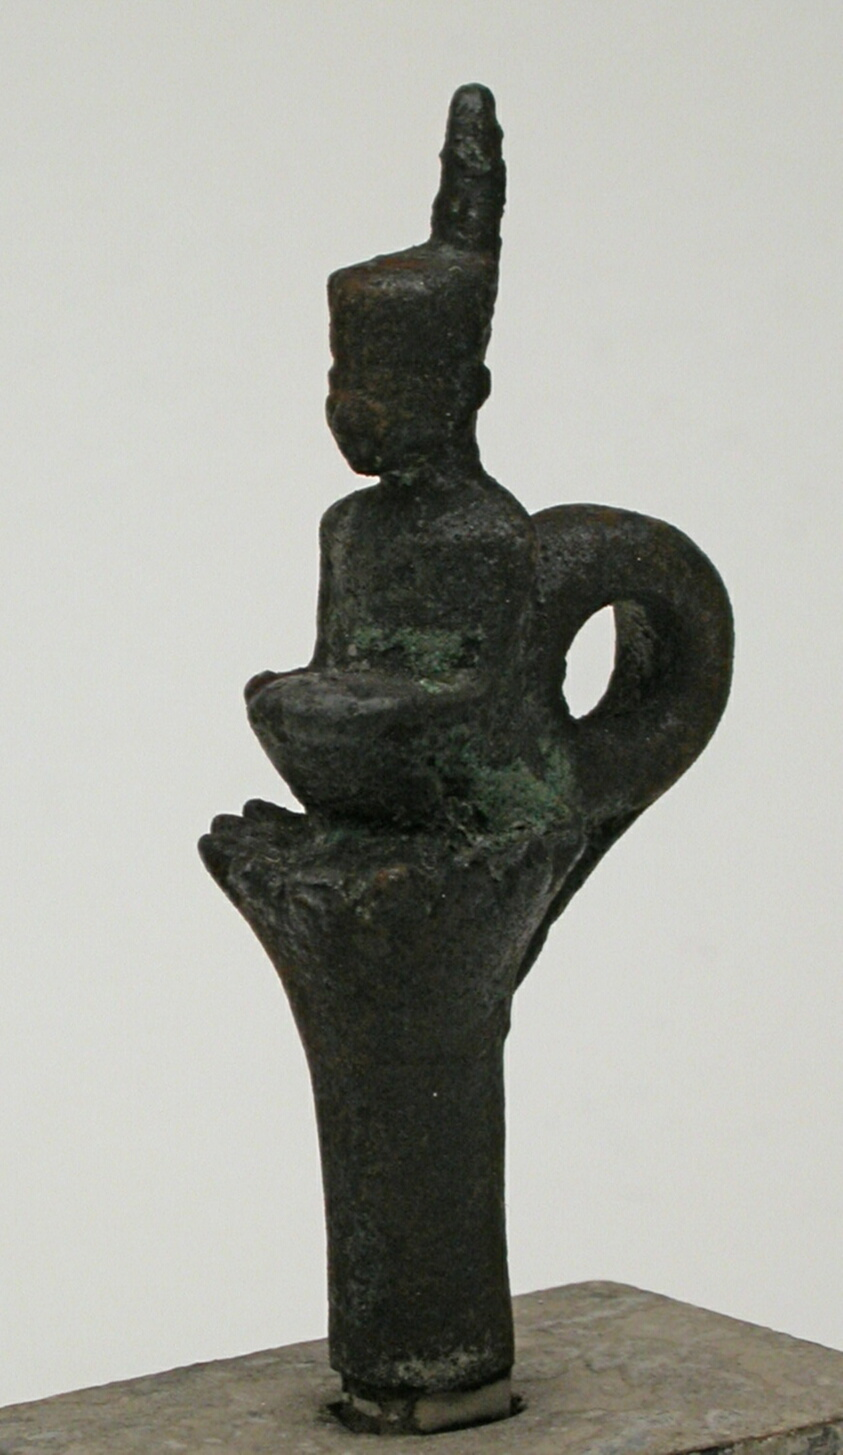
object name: Sculpture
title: Statuette of the Goddess Neith Sitting on a Lotus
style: ptolemaic, greco-roman (egyptian)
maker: Egyptian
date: Late Period (664–332 BCE)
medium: Bronze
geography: Egypt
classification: statuette; bronze; metal; sculpture; ancient art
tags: goddesses